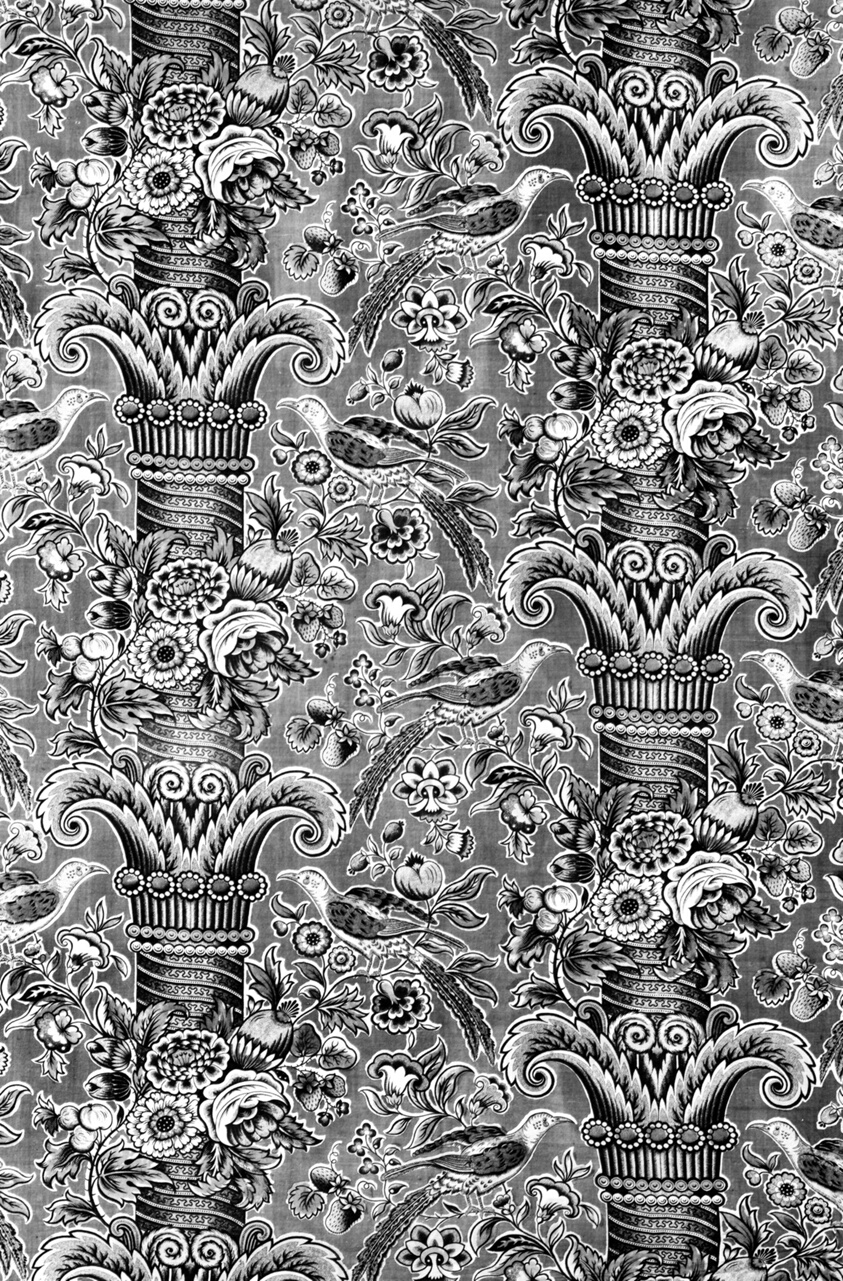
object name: Textile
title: Panel (Pillar Design)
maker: England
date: 18th century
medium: Cotton, plain weave, roller printed; painted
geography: England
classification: textile; weaving - printed; weaving